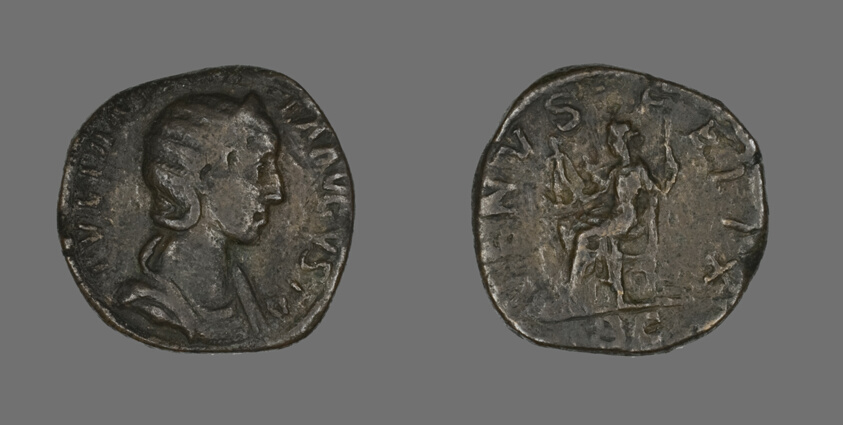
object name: Coin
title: Coin Portraying Empress Julia Mamaea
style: imperial (roman), ancient, roman (ancient, style or period)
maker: Roman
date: 222-235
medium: Bronze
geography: Roman Empire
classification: coin; struck; ancient art